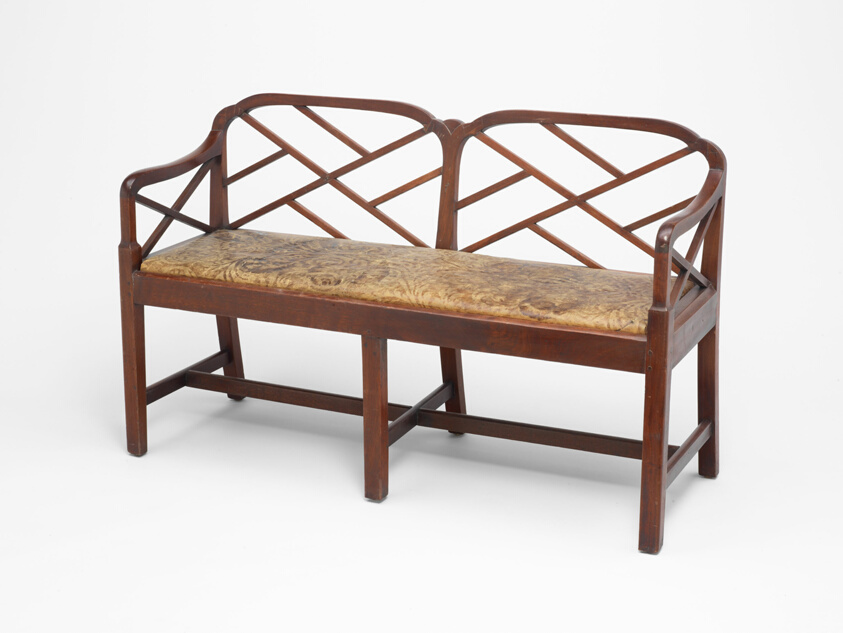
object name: Furniture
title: Settee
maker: Attributed to Joseph Walter, active c. 1768-1793; England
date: 1771/72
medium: Mahogany and painted leather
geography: England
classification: seating; furniture; european decorative arts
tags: furniture